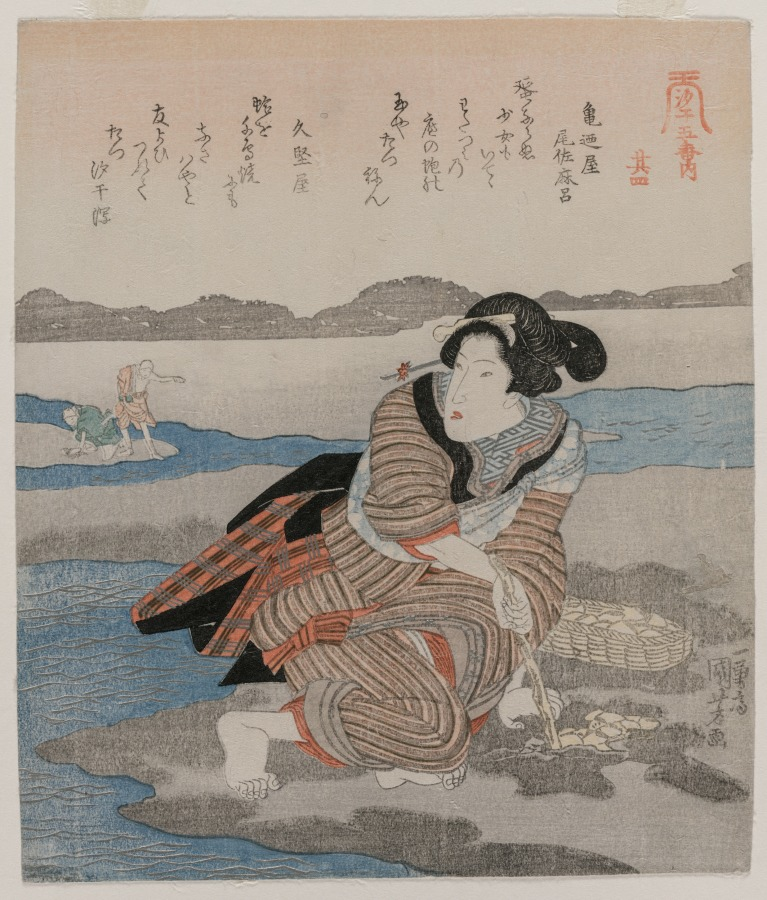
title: Fourth Print from A Low Tide Pentaptych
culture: Japan, Edo period (1615–1868)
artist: Utagawa Kuniyoshi (Japanese, 1797–1861)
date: c. 1830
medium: color woodblock print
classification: Print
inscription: Signature: Ichiyusai Kuniyoshi ga.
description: This is one of five surimono, privately commissioned prints, making up an image of people collecting sea life at low tide. Ten witty poems, written by members of a poetry circle, appear across the upper part of the composition, with two poems on each print. Based in Edo (now Tokyo), the group was led by Hisakataya Misora (active 1810s–30s), who wrote four of the poems. This composition may have been printed in April, which was considered the best time for beachcombing.